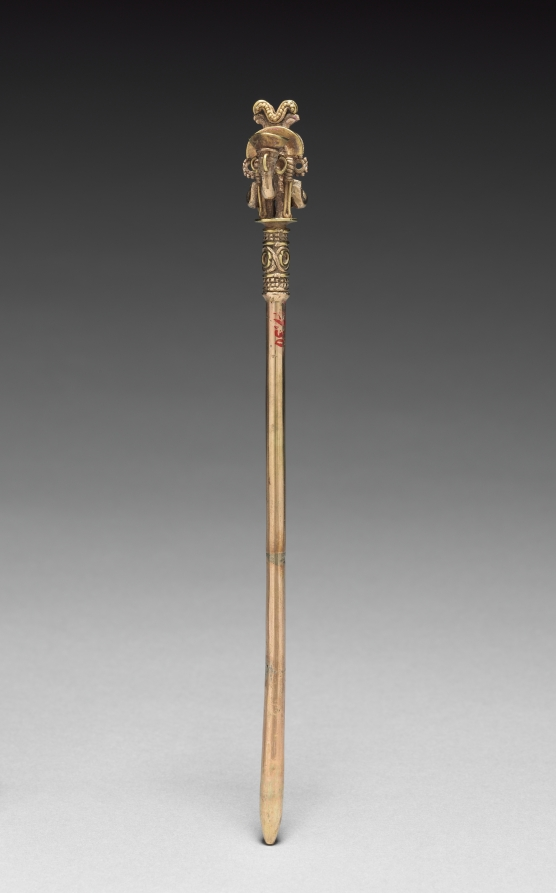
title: Lime Dipper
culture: Colombia, Calima region, Yotoco style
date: c. 1–800 CE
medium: gold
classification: Metalwork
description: Coca-leaf chewing was a widespread ritual in ancient South America. Utensils included a container and a dipper or spoon for powdered lime (made from seashells), added to the coca to enhance its gentle, stimulating effect. Colombian cultures are especially known for transforming these utensils into works of art made of precious metal. The image on the tallest dipper is wonderfully complex. A serpent coils at the bottom, beneath a snarling animal with a huge, vertical tail. This animal has a tiny monkey on its back; the monkey also has a huge tail, which rests on the first animal’s head like a headdress. This intricate image was created with the lost-wax casting process.